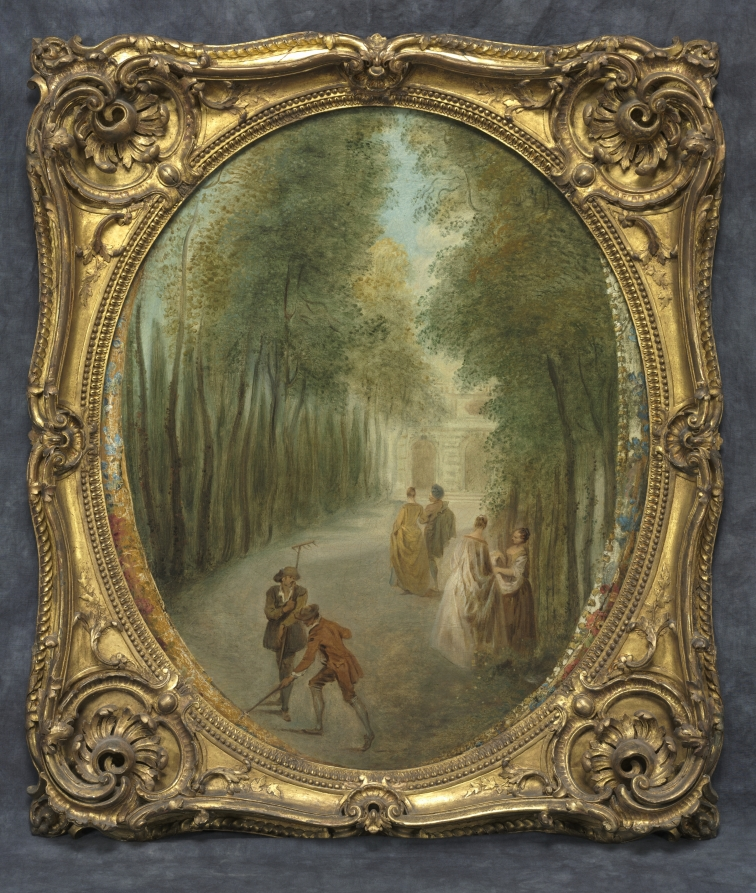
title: Spring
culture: France, 18th century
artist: Jean-Baptiste Pater (French, 1695–1736)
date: c. 1720–36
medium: oil on canvas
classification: Painting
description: Spring and Summer are two scenes from a four-season series. These landscapes were originally a part of a screen or a decorative panel, indicated by their floral borders and oval shape. The setting of Spring is believed to be the grounds of Montmorency, the country estate of Pierre Crozat (1665–1740), a wealthy financier and art collector in early eighteenth-century Paris. Summer counters Spring's aristocratic leisure by depicting rural labor. Befitting the work's decorative origins, however, Pater's scene belongs to the tradition of the timeless pastoral. More idyllic than a statement about class differences, the reapers peacefully gather sheaves of wheat as shepherds rest with their flocks in the foreground.